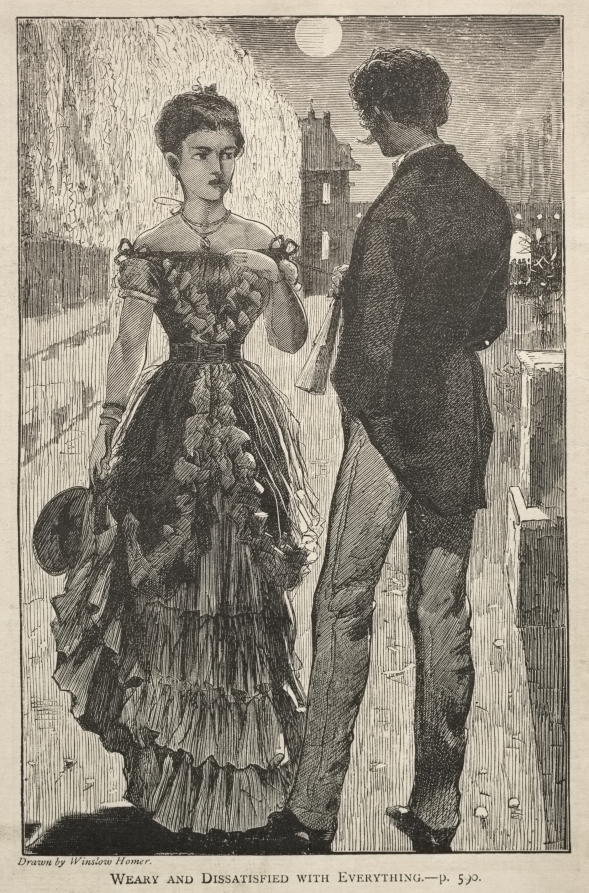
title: Weary and Dissatisfied with Everything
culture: America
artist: Winslow Homer (American, 1836–1910)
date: 1869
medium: wood engraving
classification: Print